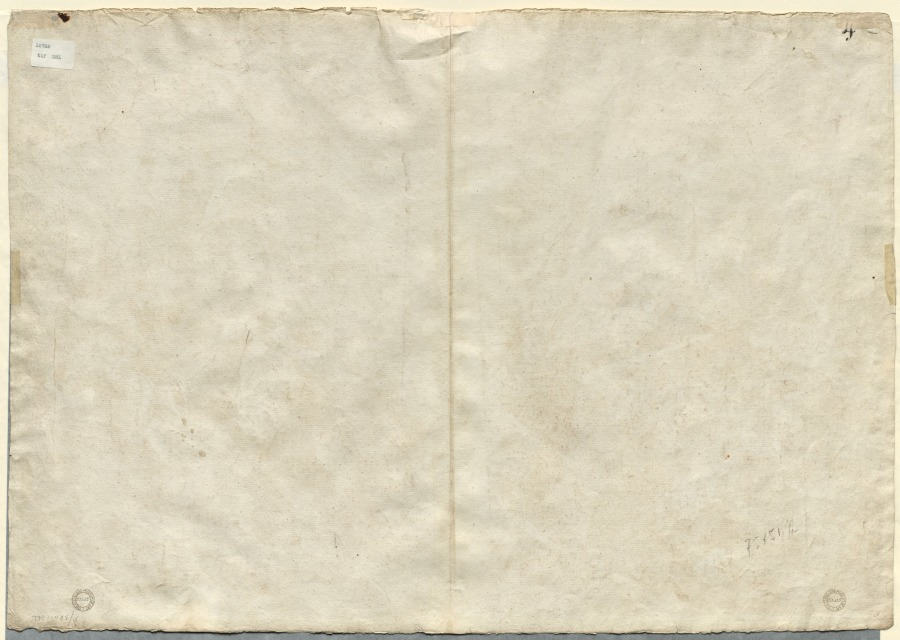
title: Jacopo Marcello Directing the Assault of Gallipoli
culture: Italy, 18th century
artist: Antonio Guardi (Italian, 1699–1760)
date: 1750–60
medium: pen and brown ink and brush and brown wash, over black chalk; framing lines in brown ink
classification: Drawing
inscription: On verso, upper right, in brown ink: "4"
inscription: verso, lower right, in brown ink: "3"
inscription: verso, upper left, typewritten on separately applied piece of paper: "12795 / tlf DRL"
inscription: verso, lower right, in graphite: "75 x 51 1/2"